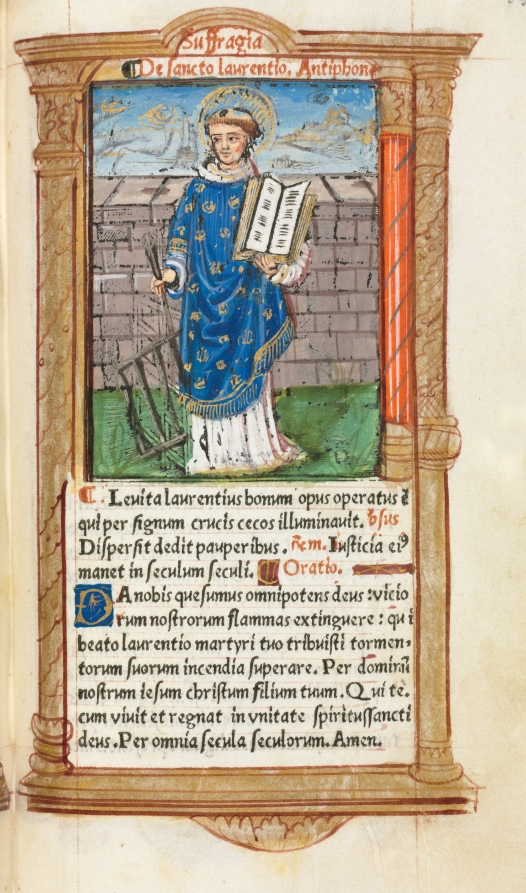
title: Printed Book of Hours (Use of Rome): fol. 101r, St. Lawrence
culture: France, Paris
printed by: Guillaume Le Rouge (French, Paris, active 1493–1517)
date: 1510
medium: 112 Printed folios on parchment, bound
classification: Bound Volume